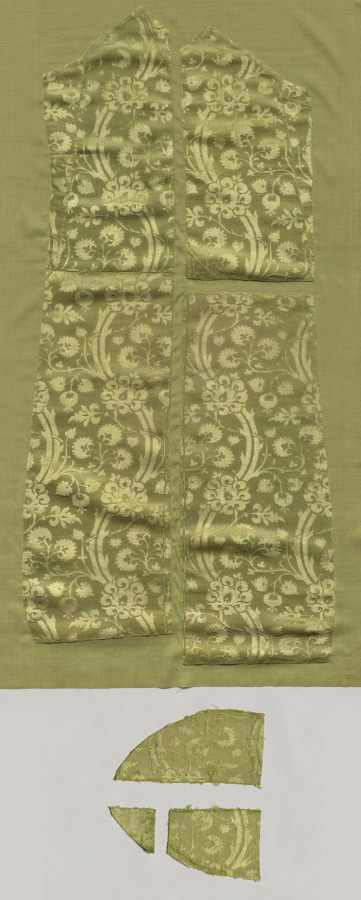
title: Fragments of a Chasuble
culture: Italy, beginning of the 15th century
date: 1400–1420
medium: velvet (cut and voided); silk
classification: Velvet